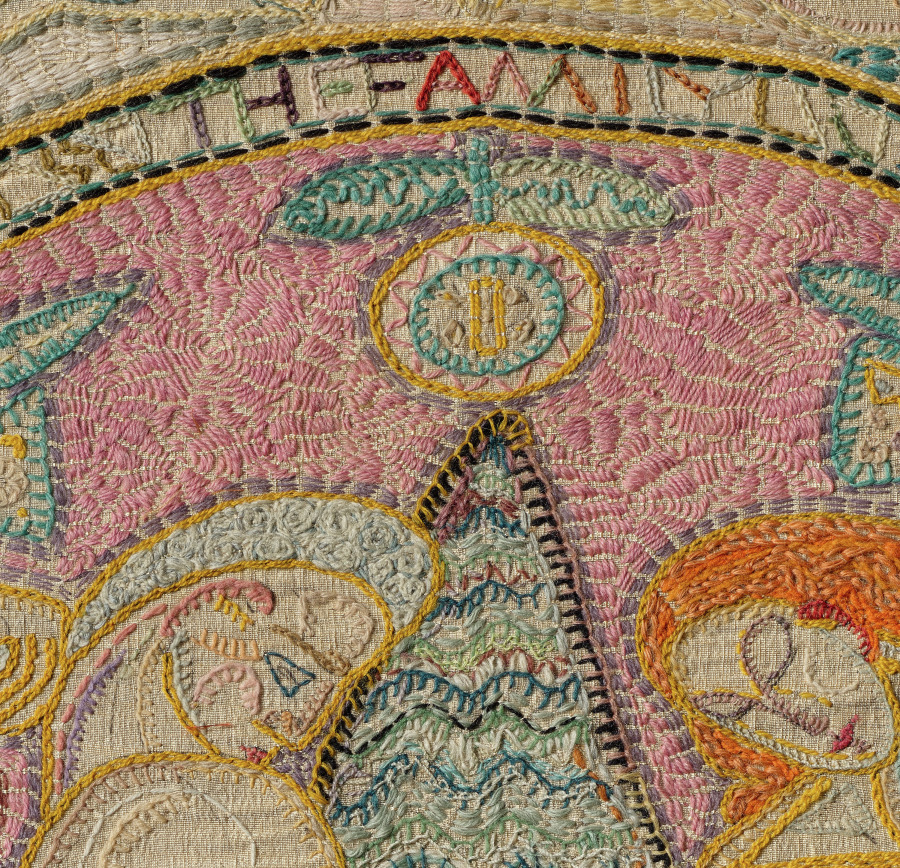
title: The Family (In Memory of a Summer in the White Mountains)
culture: America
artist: Marguerite Zorach (American, 1887–1968)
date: 1917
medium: plain weave silk; wool embroidery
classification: Embroidery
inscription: THE FAMILY / DONE BY MARGUERITE ZORACH IN THE YEAR NINETEEN HUNDRED AND SEVENTEEN IN MEMORY OF A SUMMER IN THE WHITE MOUNTAINS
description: Marguerite Zorach conceived her large, complex embroideries as major artistic statements at a time when the medium was routinely considered “craft,” as opposed to “fine art.” In doing so, she helped to erase such distinctions. One of her most acclaimed works, this example celebrates humanity in harmony with nature, presenting the artist, her husband (a Cleveland-raised sculptor named William Zorach), and their son amid an evergreen tree and four pairs of animals. Very time consuming to create, Zorach’s embroideries are rare.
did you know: In 1925, Zorach served as first president of the New York Society of Women Artists, an organization still in existence.